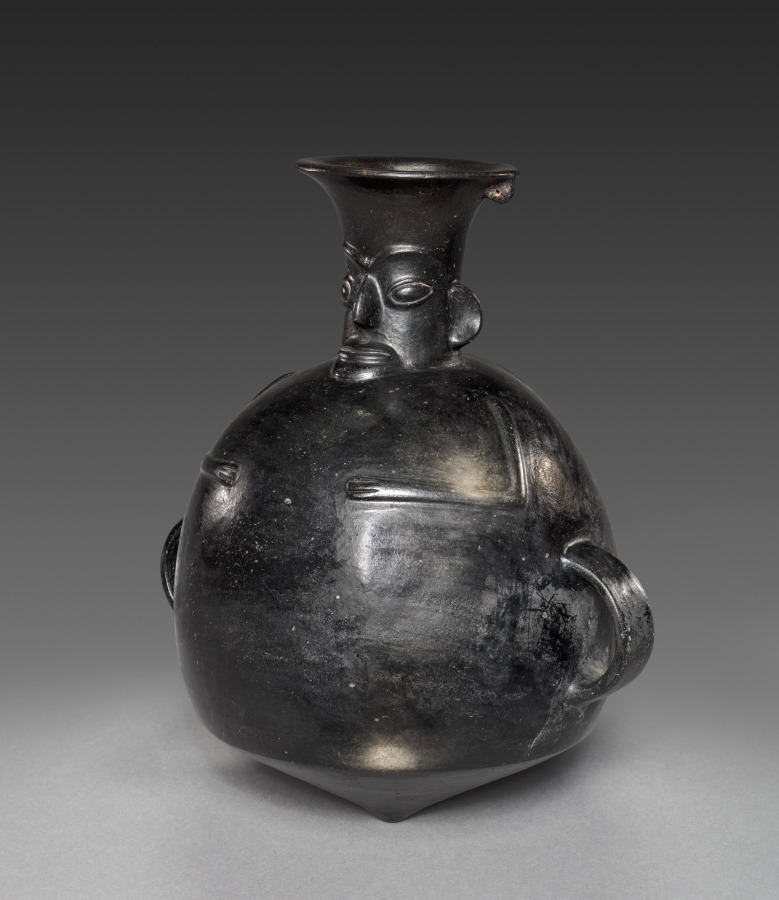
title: Hunchback Vessel (Aryballos)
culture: Central Andes (Peru), Chimú-Inka style, Late Horizon period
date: 1470–1521 (Thermoluminescence date, 1315–1615)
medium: ceramic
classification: Ceramic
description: This handsome vessel, along with the nearby double-chambered vessel, were made on the north coast after the Inka conquered the Chimú in the 1460s. Under Inka rule, many aspects of Chimú ceramic technology continued but new forms and subjects were introduced, such as the aryballos, a classic Inka vessel type. This example takes the form of a hunchback and may refer to the Inka predilection for employing hunchbacks as royal servants.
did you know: Hunchbacks seem to have functioned as servants in Inka royal palaces.